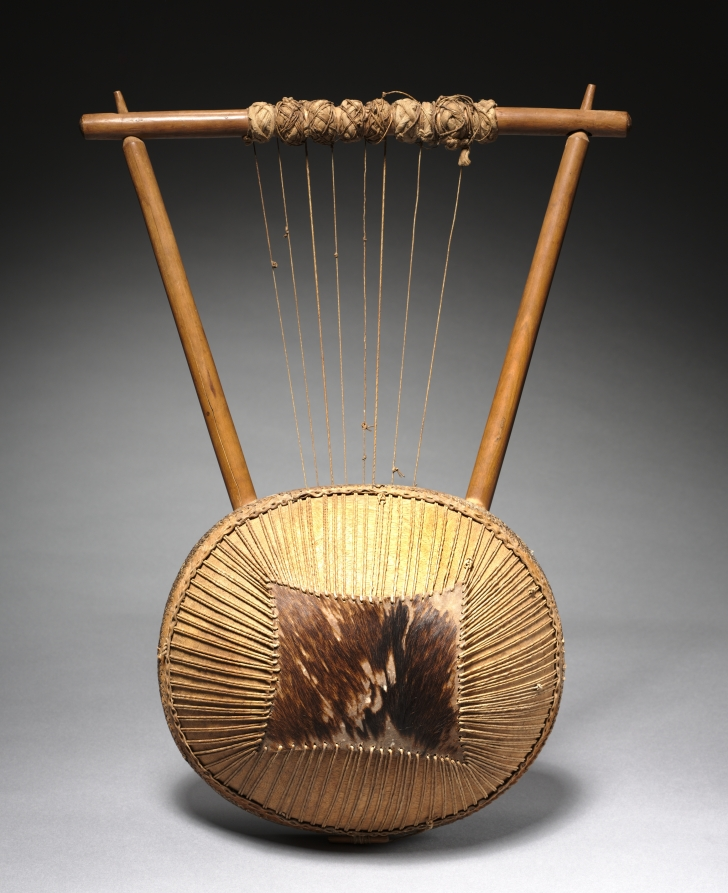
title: Lyre (ndongo, endongo, entongoli, or kissar)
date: by 1928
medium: Wood, reptile skin, pelt, cloth, and natural fiber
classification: Musical Instrument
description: Lyres are common instruments across eastern Africa. The many names––endongo, ndongo, kissar, or entongoli—reflect how many different groups use this Ugandan type. This example is made from a wooden bowl-shaped sound box covered in the skin of a reptile, possibly a monitor lizard. The strings lead up to a crossbar once decorated with goat hair tassels at each end and sometimes cowrie shells.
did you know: Imagine the buzzing, resonant sound that this string instrument would make.